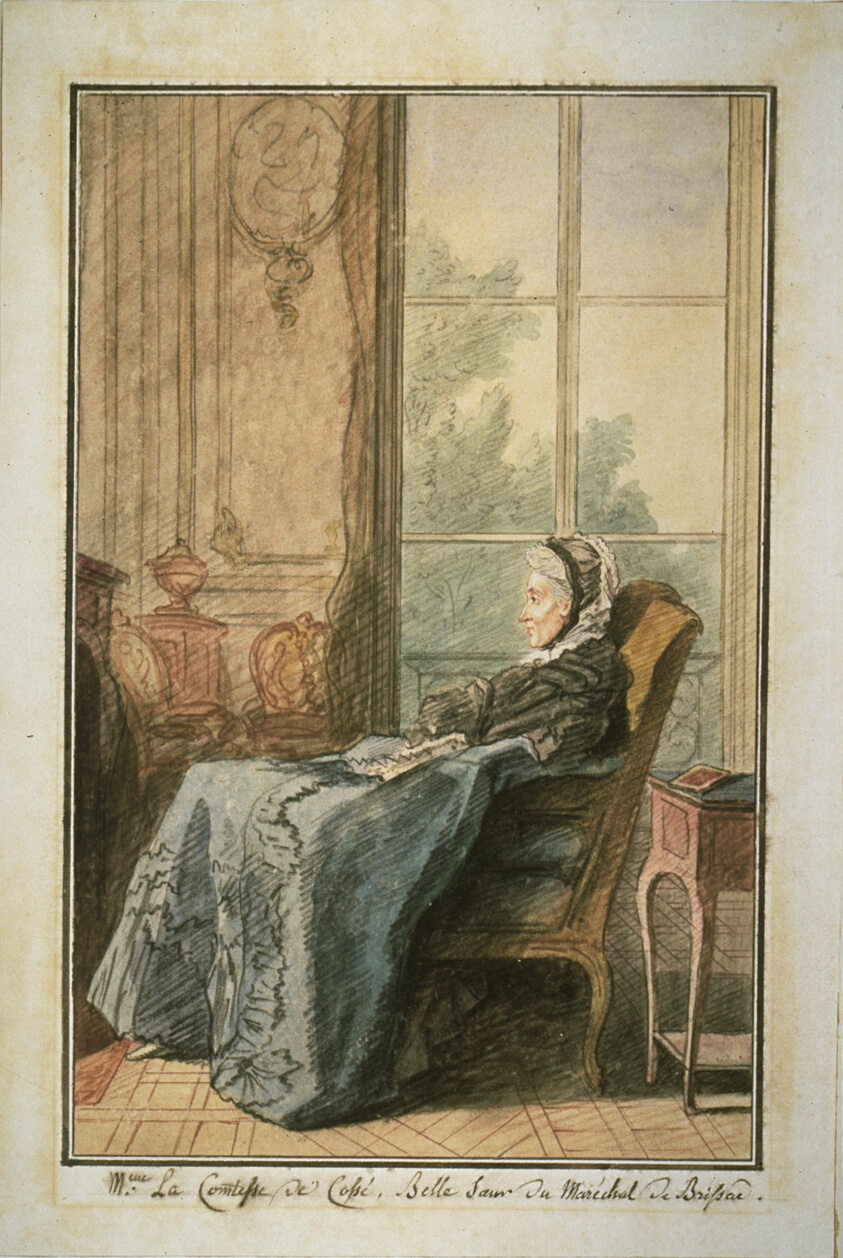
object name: Drawing and Watercolor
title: The Comtesse de Cossé in a Salon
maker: Imitator of Louis Carrogis de Carmontelle; French, 1717-1806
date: after 1768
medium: Black and red chalk, and watercolor, on ivory wove paper, laid down on ivory laid paper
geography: France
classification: watercolor; drawings (visual works); prints and drawing